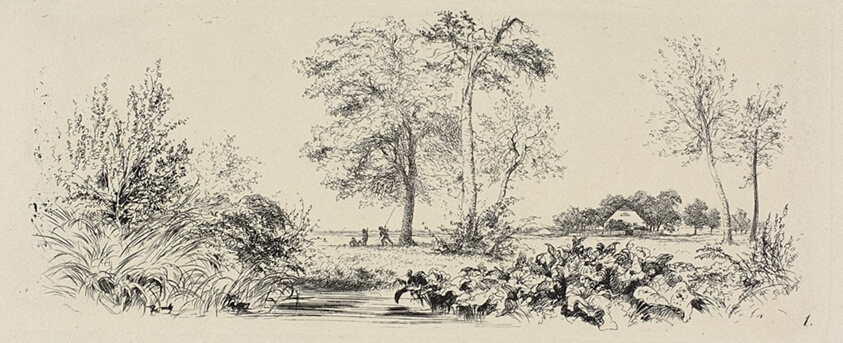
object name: Print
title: Plate one, from Radierversuche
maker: Adolph Menzel; German, 1815–1905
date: 1843, published 1844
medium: Etching in black on ivory wove paper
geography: Germany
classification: etching; print; prints and drawing